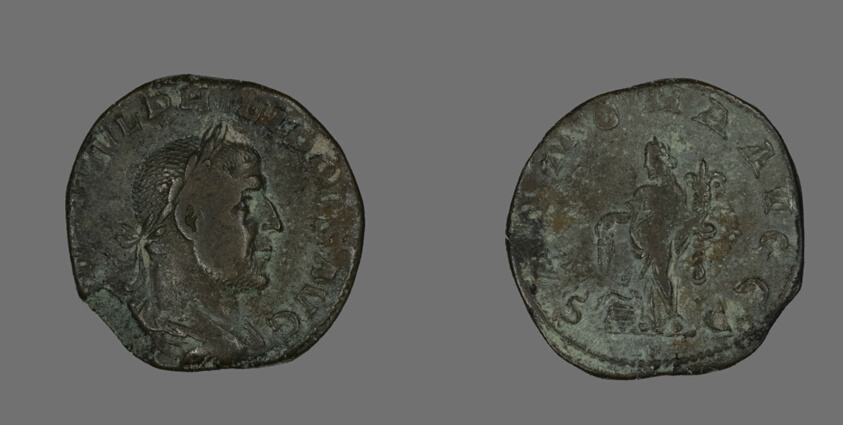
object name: Coin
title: Sestertius (Coin) Portraying Philip the Arab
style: roman (ancient, style or period)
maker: Roman, minted in Rome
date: 244-249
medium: Bronze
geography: Roman Empire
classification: coin; ancient art